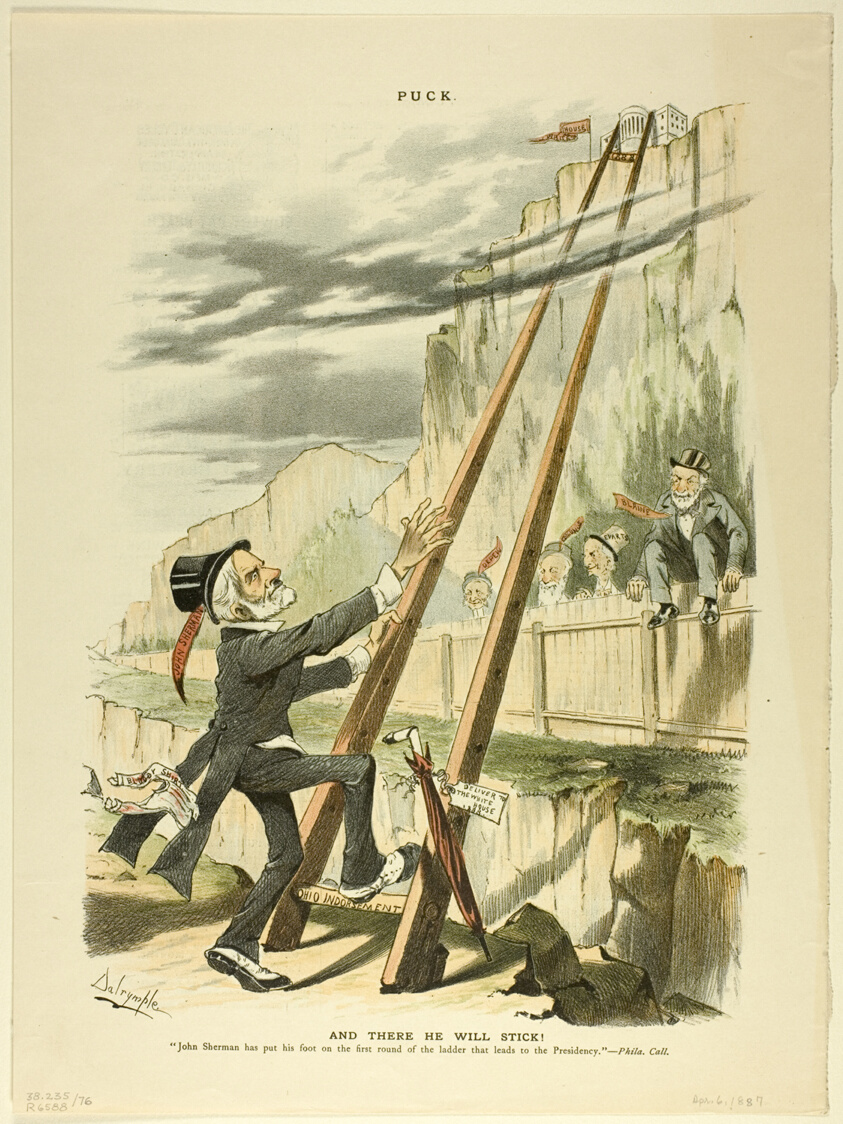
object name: Print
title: And There He Will Stick!, from Puck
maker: Louis Dalrymple (American, 1865-1905)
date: published April 6, 1887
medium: Color lithograph on newsprint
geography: United States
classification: lithograph; print; prints and drawing